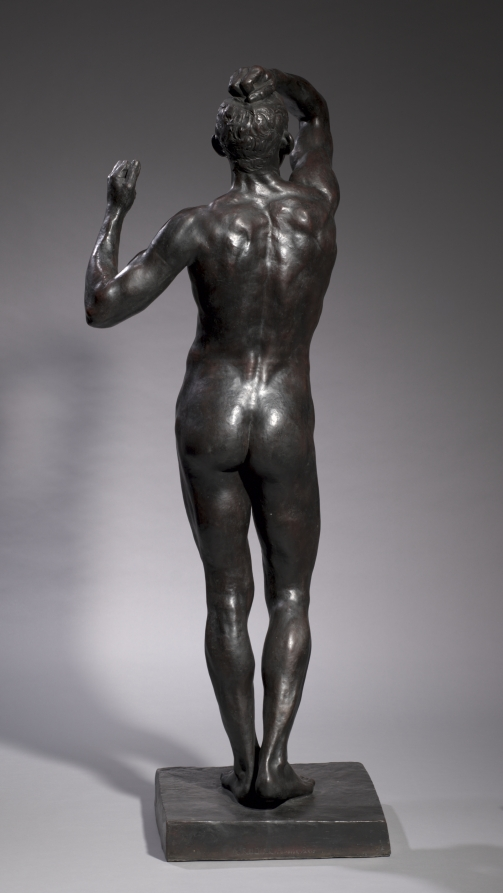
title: The Age of Bronze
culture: France, 19th century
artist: Auguste Rodin (French, 1840–1917)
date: 1875–76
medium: bronze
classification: Sculpture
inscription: inscribed top of base to right: Rodin; inscribed back of base: A. RUDIER Fondeur Paris.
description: Rodin’s earliest surviving life-size sculpture, The Age of Bronze is an enigmatic and provocative image of a man awakening to new consciousness. The figure originally held a spear in one hand; by removing the weapon, Rodin stripped the sculpture of narrative symbols and focused on the sensuality and psychological power of the male nude. Contemporaries found the figure so realistic they falsely accused Rodin of making a cast from a living person. Museum trustee Ralph King commissioned this cast from the artist in 1916 with the intention of donating it to the museum. Rodin personally supervised the exceptionally fine casting and finished it with his favorite patina, a deep reddish tone he called “crushed grape.”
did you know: The sculpture suggests the heroism and suffering of his countrymen during the Franco-Prussian War of 1870–71. This life-sized male figure was modeled after a Belgium soldier named August Neyt.